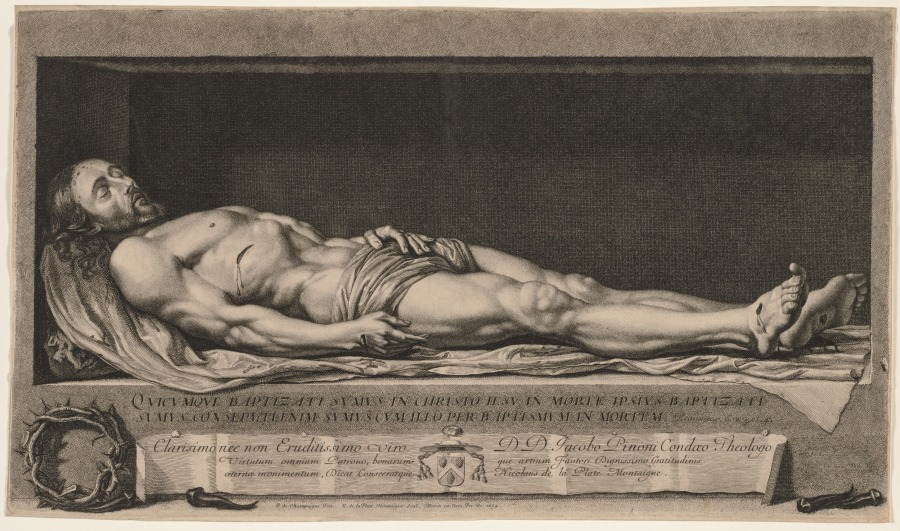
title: The Body of Christ in the Sepulchre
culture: France, 17th century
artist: Nicolas de Platte-Montagne (French, 1631–1706)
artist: after Philippe de Champaigne (French, 1602–1674)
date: 1654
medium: etching and engraving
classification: Print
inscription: Notations by Prosper de Baudicour written in graphite on verso: "Pièce exécutée 'dans le pur goût de Morin' et 'de toute beauté' selon Robert-Dumesnil"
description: In addition to his activities as a portrait and history painter, Plattemontagne was one of the greatest printmakers in France during the 17th century. The Body of Christ in the Sepulchre is one of the artist's masterpieces. Here the combination of etching and engraving is particularly effective in creating dramatic effects of light, shade, and texture.